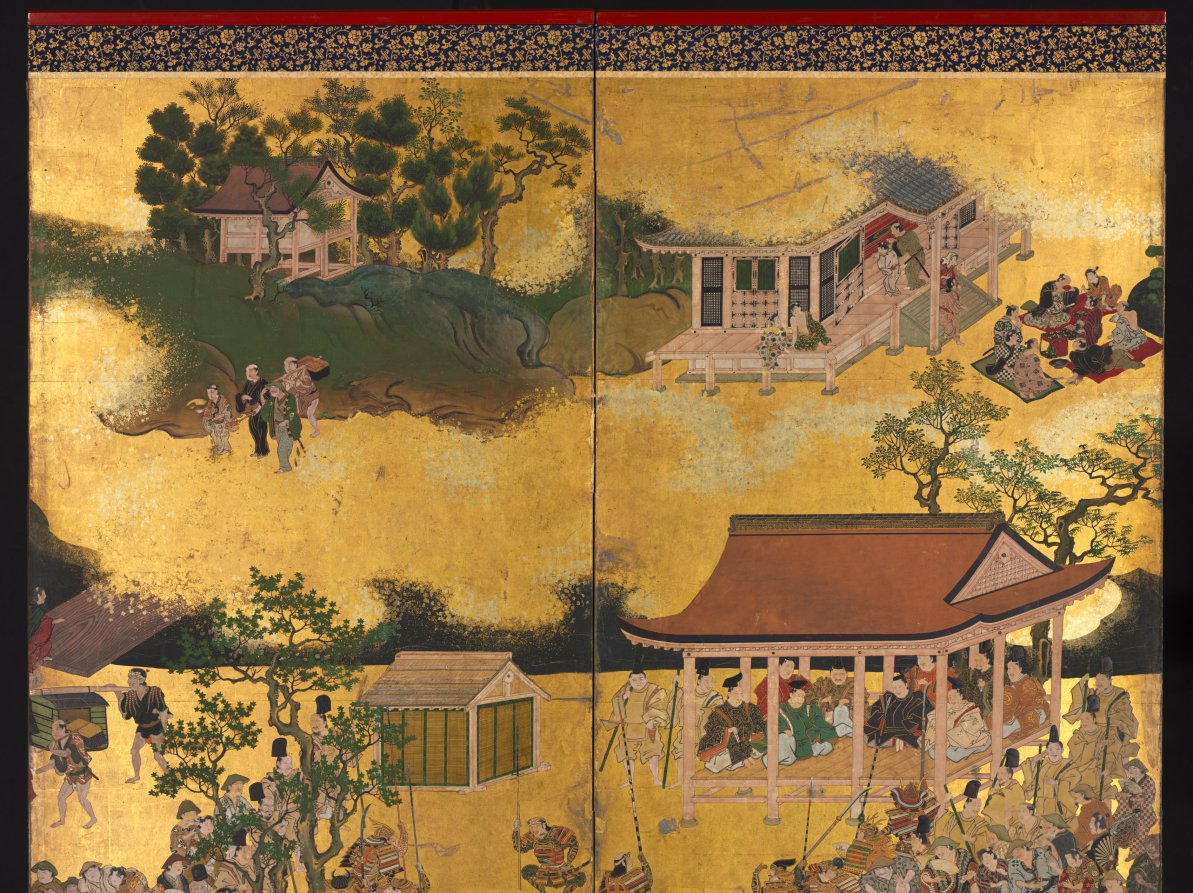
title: Horse Race at the Kamo Shrine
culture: Japan, Edo period (1615–1868)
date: early to mid-1600s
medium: One of a pair of six-panel folding screens; ink and color on gilded paper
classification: Painting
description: Kamo Shrine in Kyoto, seen in the upper half of the left screen, has held an annual horse race on May 5th since the ninth century. Serving as a snapshot of the festivities, this pair of screens captures nearly 600 people watching the race, beginning at the bottom part of the right screen and continuing to the left. The race is a great spectacle where aristocratic riders cling to their fast and unwieldy mounts. While many of those in attendance seem in rapt attention to the main event, other vignettes depict people engaged in an array of activities. This pair of screens was likely originally part of a group of linked murals.